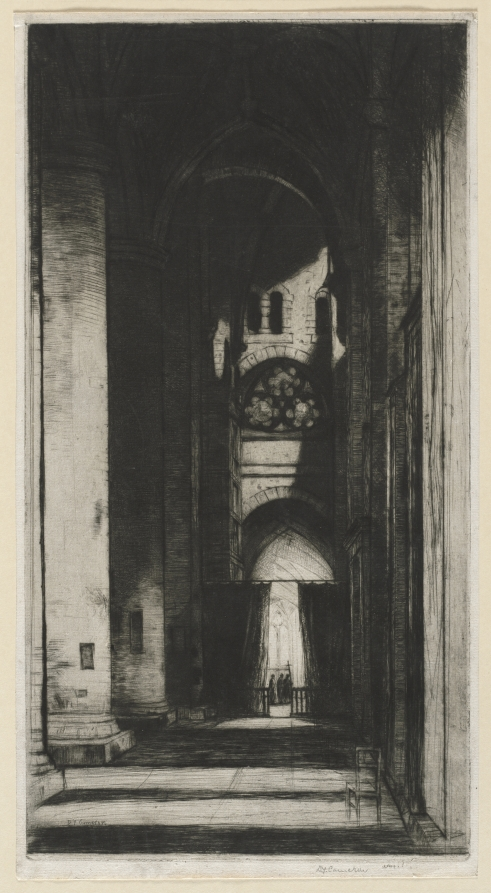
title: Tewksbury Abbey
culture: England, 20th century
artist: David Young Cameron (British, 1865–1945)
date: 1915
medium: etching and drypoint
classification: Print